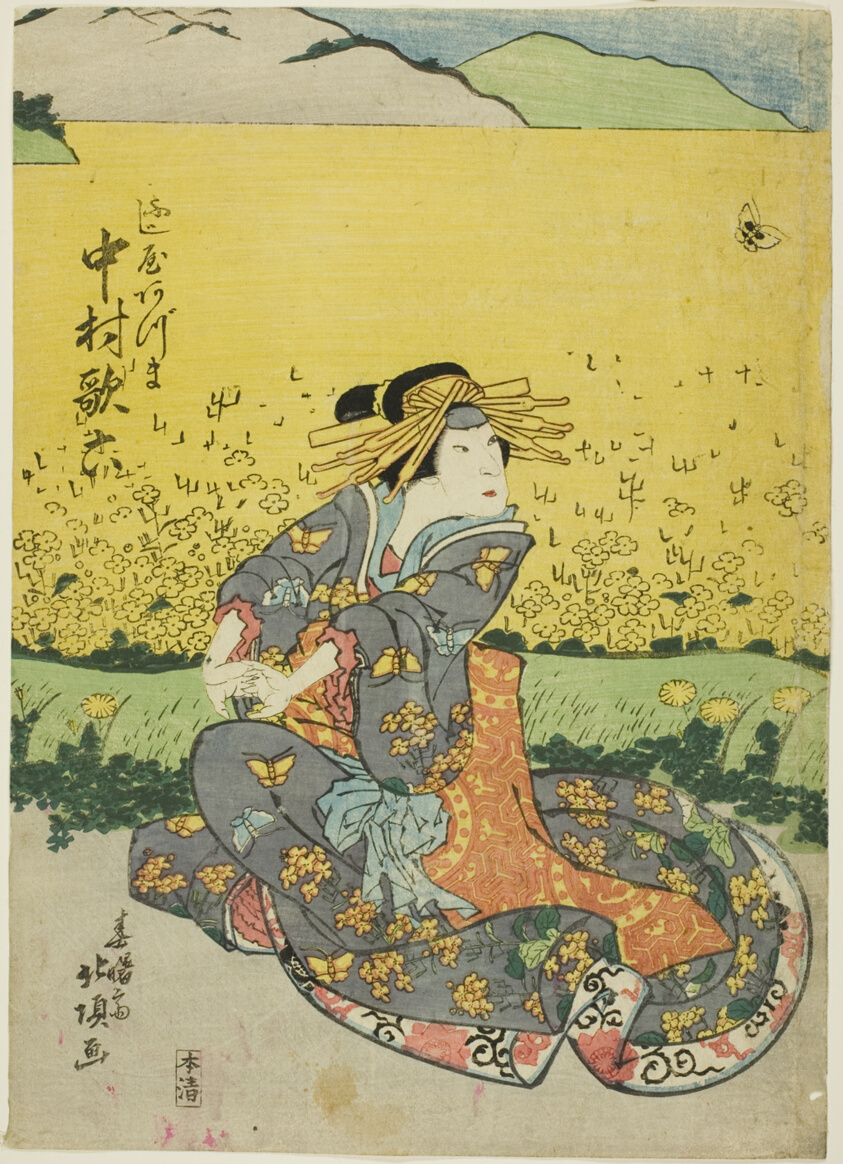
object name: Print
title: The Actor Nakamura Karoku I as Fujiya Azuma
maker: Shunshosai Hokucho (Japanese, active 1822–30)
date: 1827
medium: Color woodblock print; sheet from oban tetraptych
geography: Japan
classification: print; asian art